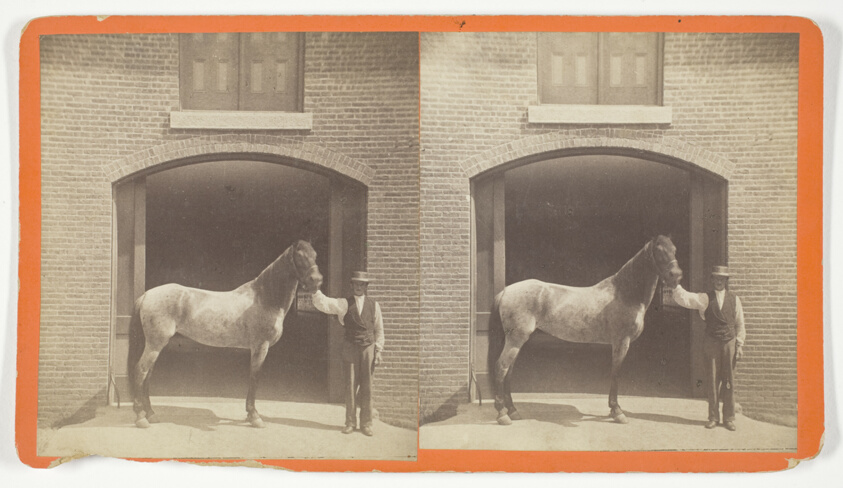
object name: Photograph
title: Untitled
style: 19th century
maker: Artist unknown; Late 19th century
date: 1875/99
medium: Albumen print, stereo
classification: photography; photograph